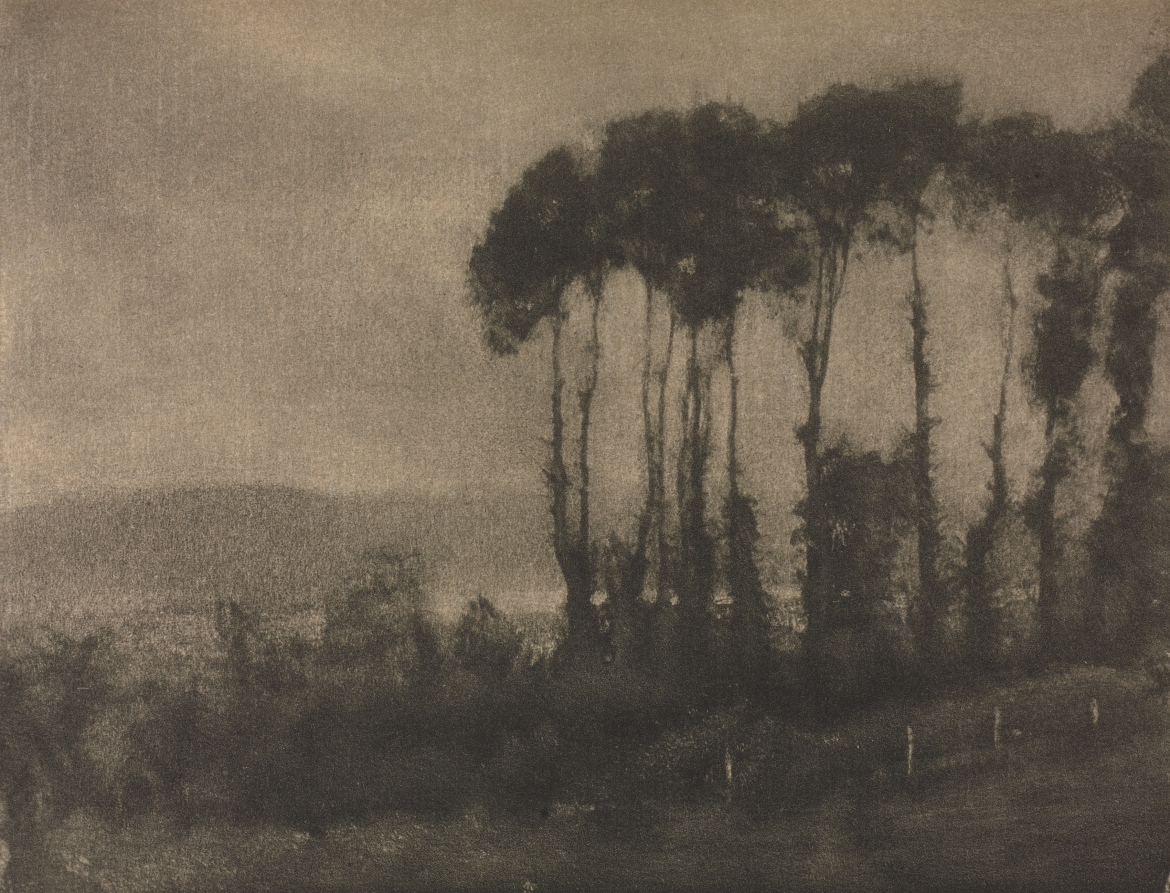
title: Camera Work: Toucques Valley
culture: France, 20th century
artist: Robert Demachy (French, 1859–1936)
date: 1906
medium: photogravure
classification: Bound Volume